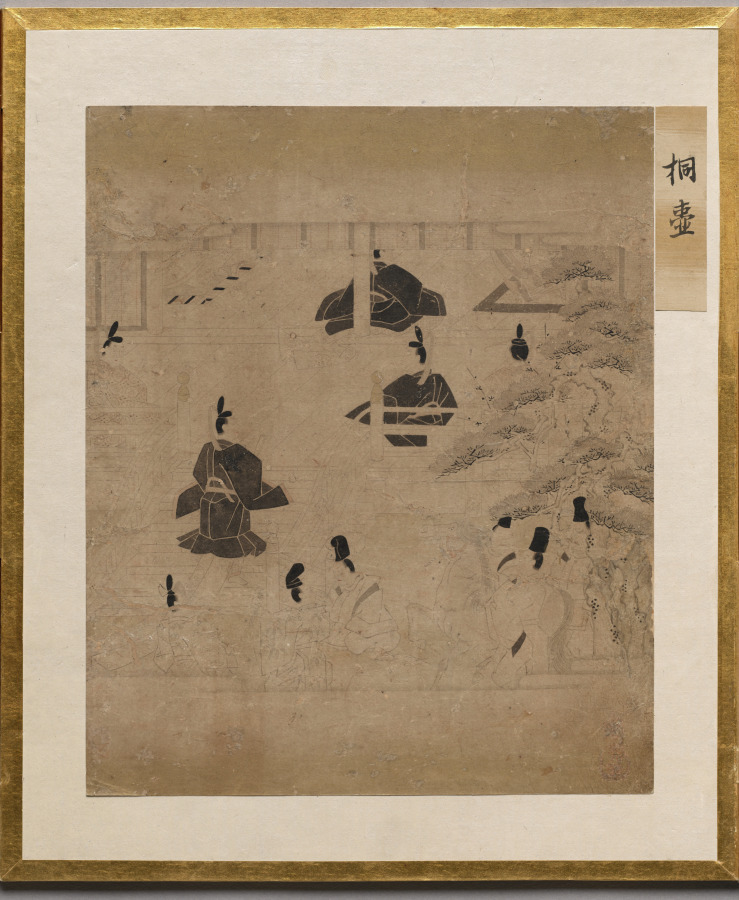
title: Paulownia Court from Album of Illustrations for the Tale of Genji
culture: Japan, Edo period (1615–1868)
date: 1600s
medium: painting in an accordion-style album; ink, light color, and gold on paper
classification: Bound Volume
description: This album contains illustrations for the classic literary work the Tale of Genji, authored in the 1000s by Murasaki Shikibu, an aristocrat of the Heian period (794–1185) court. The scenes are painted in the “white drawing” (hakubyō) mode, in which a fine ink line is used to depict figures and spaces with great subtlety, punctuated only occasionally by traces of red pigment for a character’s lips, a detail of a garment, or a decorative element. These two scenes illustrate episodes from the chapters “Thin Veil of Cloud” (Usugumo) and “Barrier Gate” (Sekiya).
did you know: The illustrations are identified by chapter title in cartouches to the upper right of the paintings.